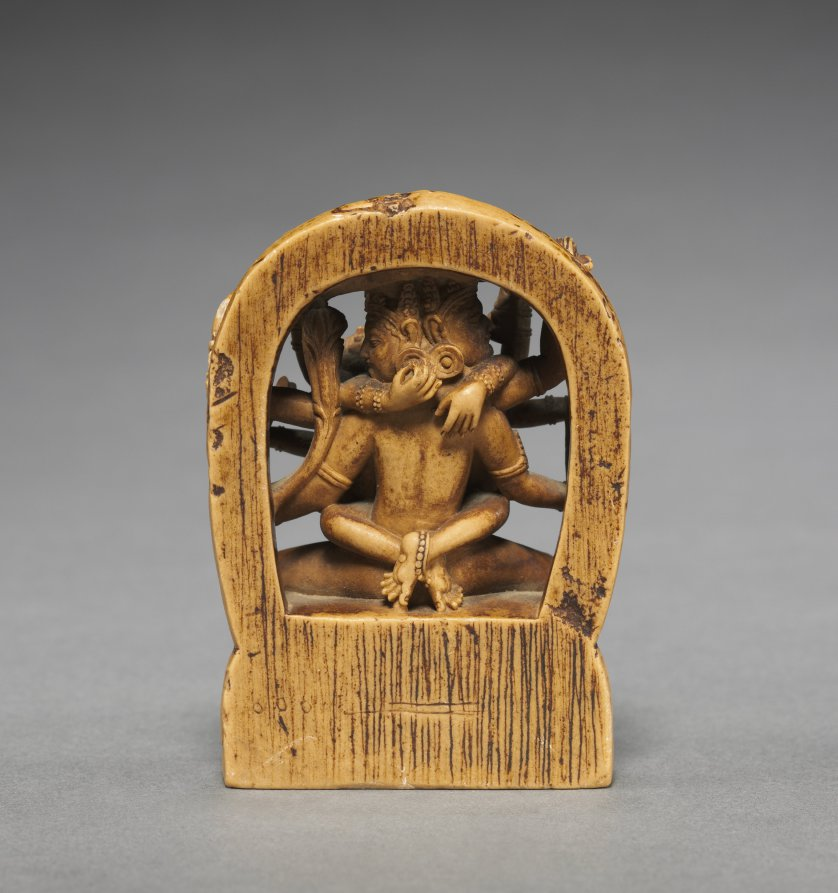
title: Manjuvara with consort (yab-yum)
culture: Tibet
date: c. 1100s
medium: Kaolin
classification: Sculpture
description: This miniature stele shows Manjuvara, a form of the the Bodhisattva of Wisdom Manjushri, in union (yab yum) with his consort (sakti). The intimacy between the deities, in accordance with Vajrayana Buddhism, is symbolic of the union between wisdom and compassion that leads to the bliss of enlightenment. Both figures have three heads and six arms holding their attributes: a sword (khadga), a bow (dhanus), an arrow (bana), and a lotus (padma). The sculpture is made in kaolinite, a clay-based stone frequently used in the northern regions of India and Burma. The exceptionally fine carving, executed with great precision and attention to detail, reflects the Pala style instrumental in the development of the Himalayan schools of sculpture.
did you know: A devotee would have carried this small devotional item as a personal, portable shrine.